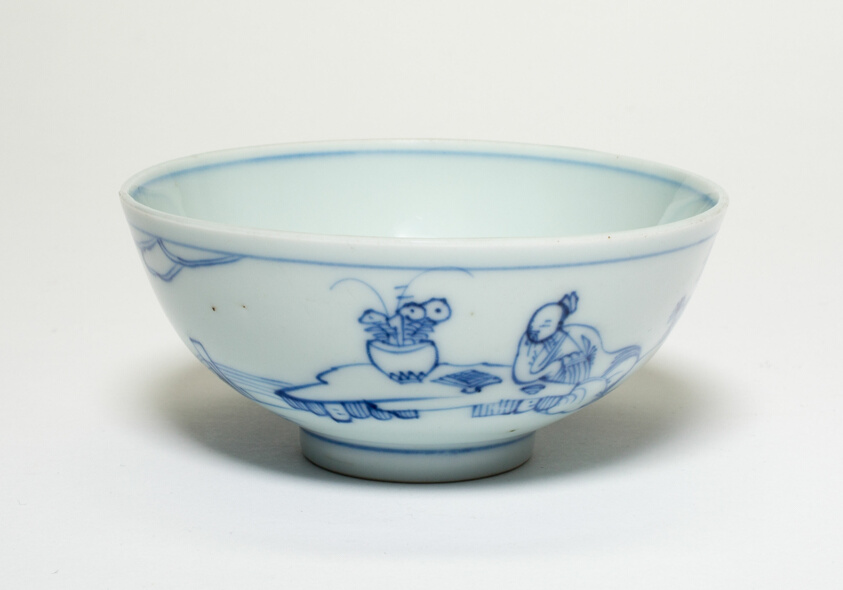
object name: Vessel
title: Bowl with Scholar and Attendant by a Willow Tree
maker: China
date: Early Qing dynasty (1644–1911), 17th/18th century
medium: Porcelain painted in underglaze blue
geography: China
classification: porcelain; asian art; ceramics